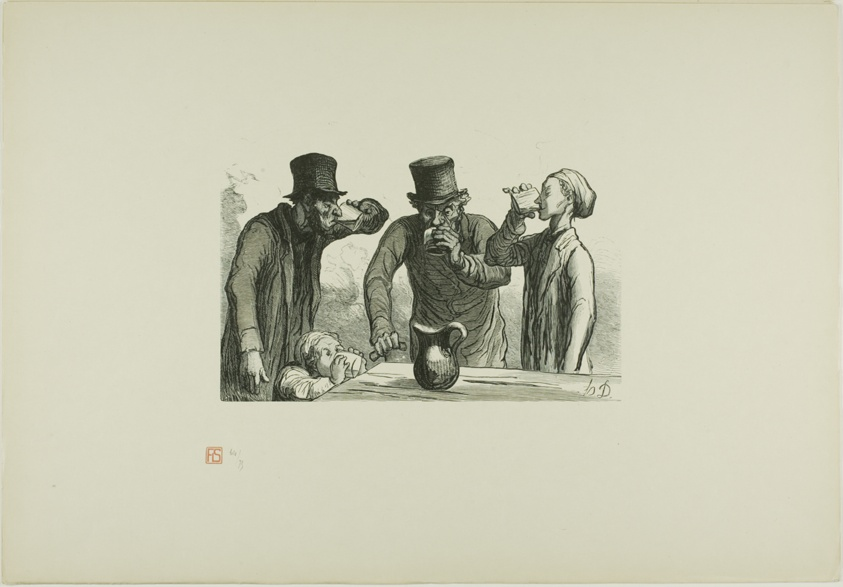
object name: Print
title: Physiology of Drinking: The Four Ages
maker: Charles Maurand (French, 1824-1904); after Honoré Victorin Daumier (French, 1808-1879); printed by François Louis Schmied (Swiss, 1873-1941); published by Jules Meynial (French, 20th century)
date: 1862, printed 1920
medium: Wood engraving on cream Japanese paper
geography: France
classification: wood engraving; print; prints and drawing